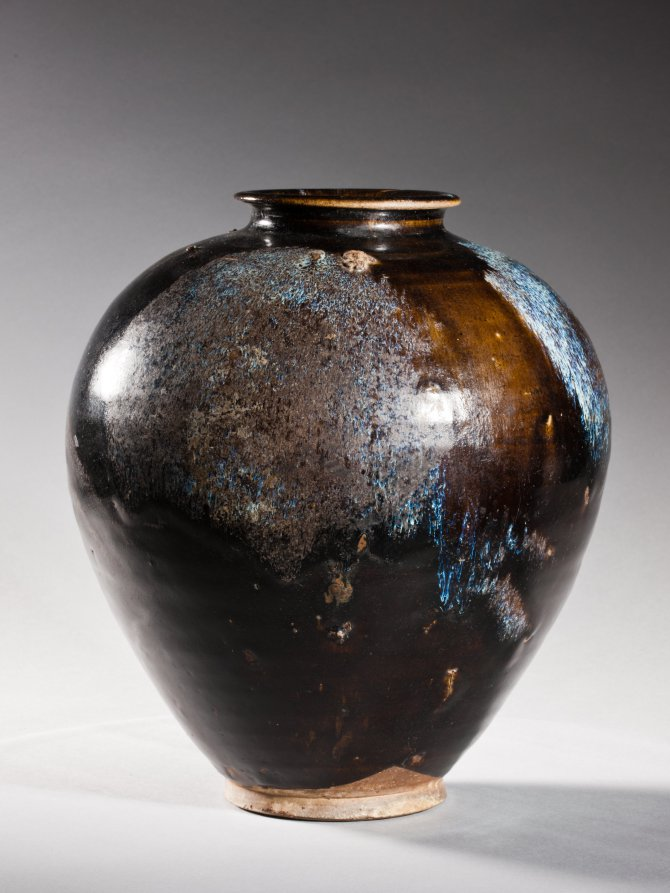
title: Jar: Black Ware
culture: China, Henan province, Huangdao kilns, Tang dynasty (618-907)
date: 700s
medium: glazed stoneware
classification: Ceramic